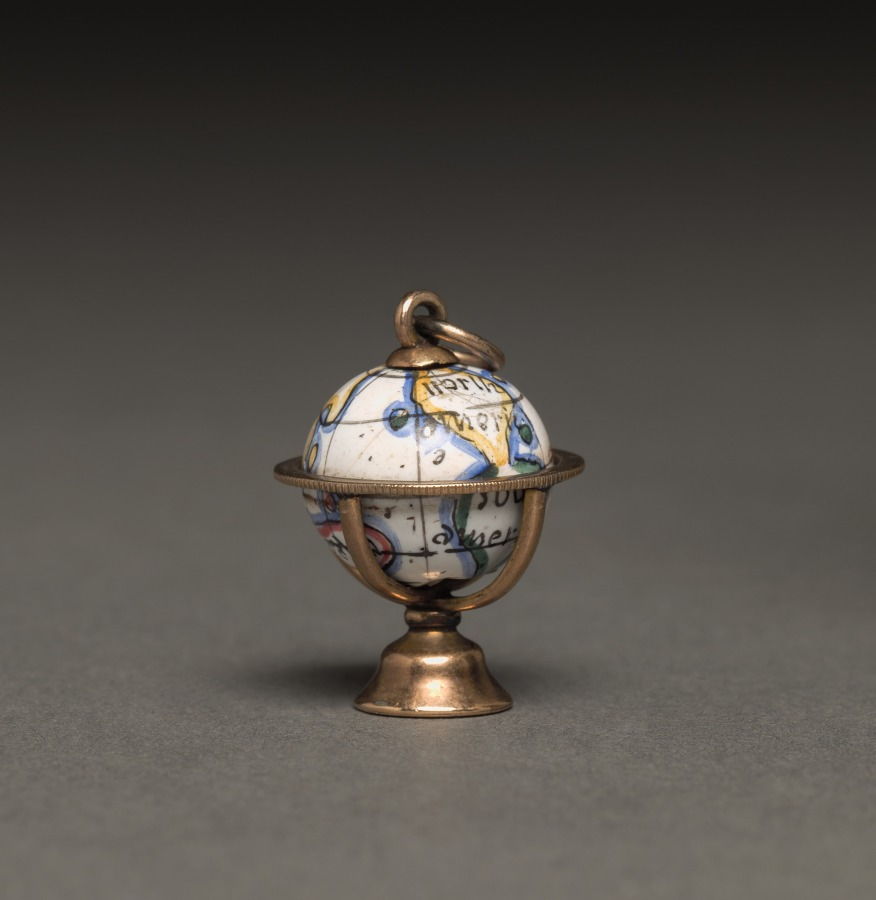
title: Charm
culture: England, mid-18th Century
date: mid-18th century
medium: enamel on metal with gold stand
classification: Enamel